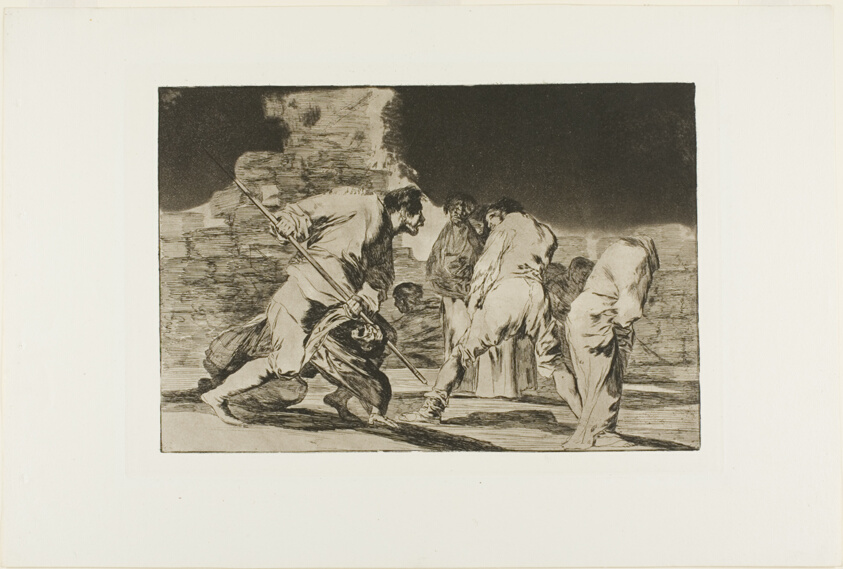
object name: Print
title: It is Amazing - and We were Made by God, plate six from Los Proverbios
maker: Francisco José de Goya y Lucientes (Spanish, 1746-1828)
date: 1815/24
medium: Etching and burnished aquatint on ivory wove paper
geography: Spain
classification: etching; print; prints and drawing